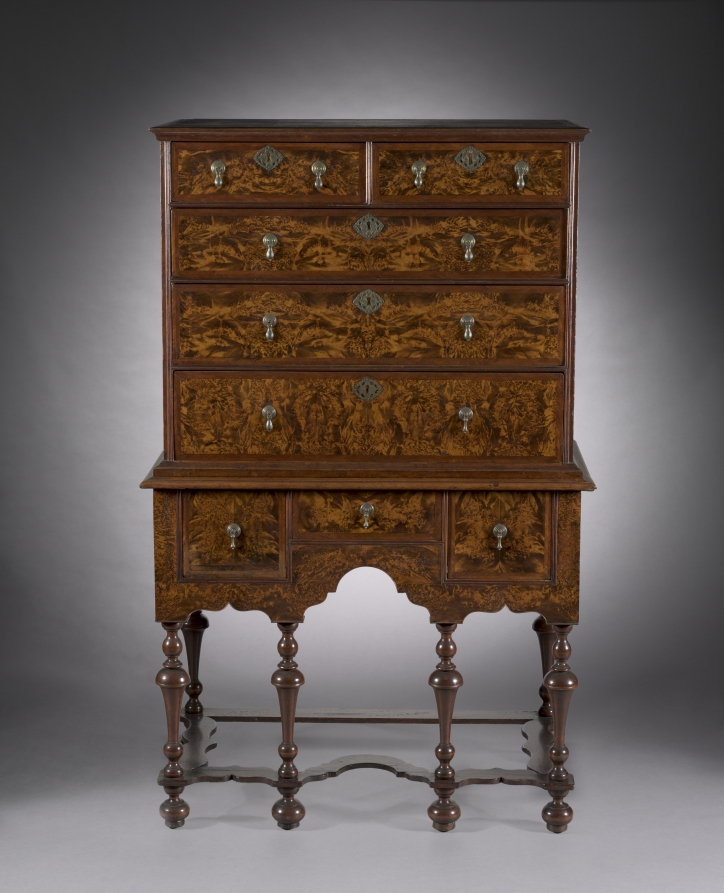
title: Highboy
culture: America, Massachusetts, William and Mary style, 18th century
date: 1700–1720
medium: burled maple veneer with walnut herringbone bandings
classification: Furniture and woodwork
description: One of the most notable developments in American furniture around 1700 was the introduction of "highboys" --- tall chests of drawers on high stands. These chests, often with bases having elaborately turned legs connected by a framework of stretchers, resemble closely English examples of the late 1600s during the reign of William and Mary. The decoration consists almost entirely of thin layers, or veneers, of richly patterned wood. These veneers were cut from burls (tumorlike growths on trees) and then carefully assembled and glued to create symmetrical patterns like those seen on the front of this highboy. The brass pulls on the drawers are typical of this period and may be original.